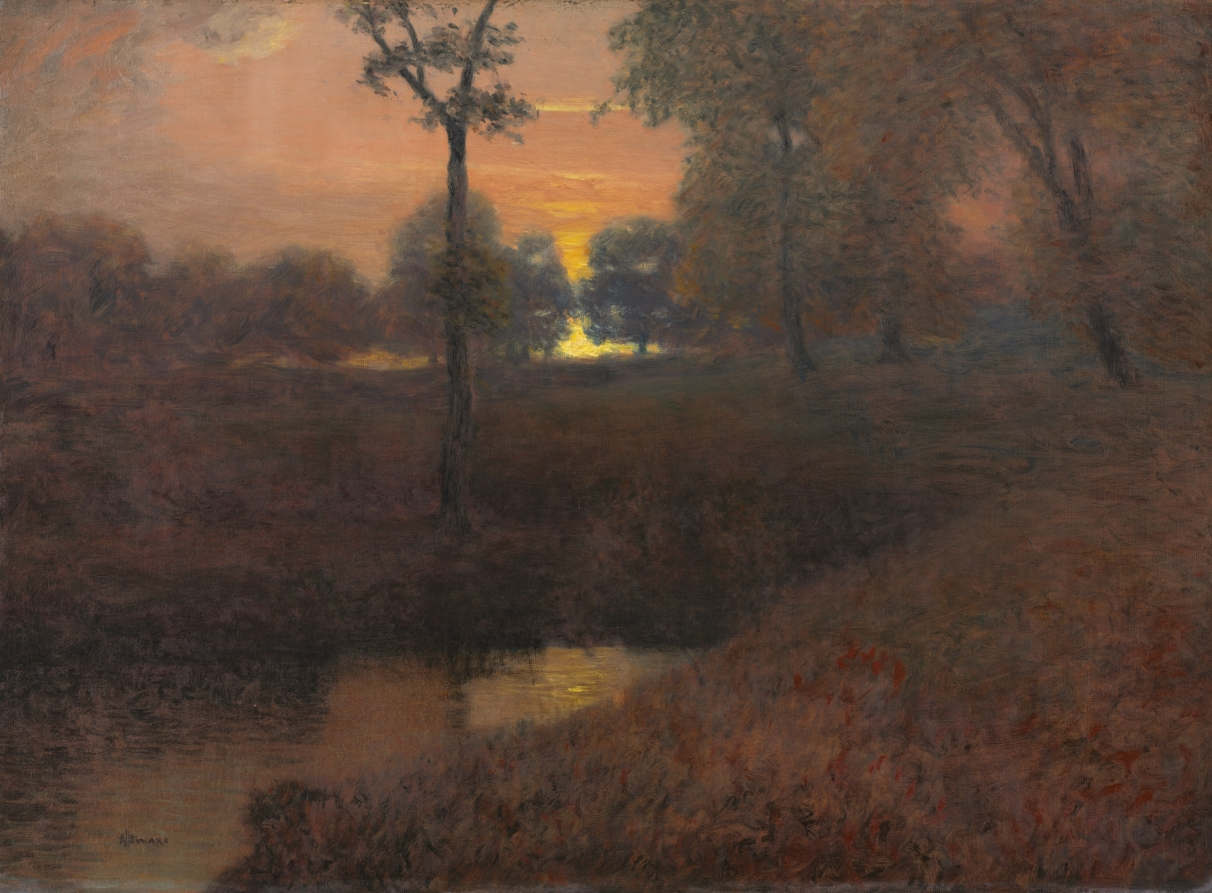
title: Evening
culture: America, Ohio, Cleveland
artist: Hugh Huntington Howard (American, 1860–1927)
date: before 1919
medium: oil on canvas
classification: Painting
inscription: signed: HHHoward.